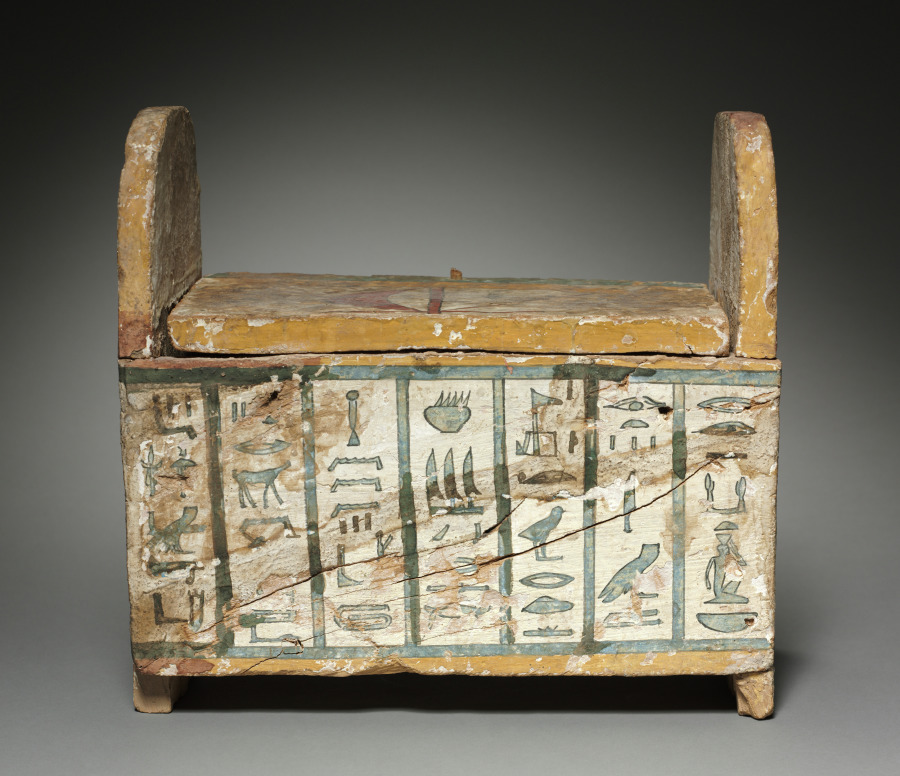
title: Covered Box for Shawabtys of Ditamenpaankh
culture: Egypt, Late period (715–332 BCE), Dynasty 25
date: 715–656 BCE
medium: painted wood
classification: Funerary Equipment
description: High demand for shawabtys in the Late Period, a time when as many as 400 or more shawabtys were placed in the tomb with the deceased, gave rise to a specialized container for storing them: the shawabty box. This example is inscribed for the lady of the house, Ditamenpaankh, and was probably one of a pair originally made for her. The single-masted boat on the box’s lid is perhaps an allusion to the pilgrimage of the deceased to the holy city of Abydos, the cult city of Osiris, king of the dead. The shawabtys inside are crude, mass-produced examples cast in an open mold. Made of terracotta, their blue paint imitates more costly shawabtys made of faience. As for the shawabty spell, it has been removed from its traditional location on the shawabty’s front and relocated onto the sides of box, where it needed only to be written once, thus expediting production.